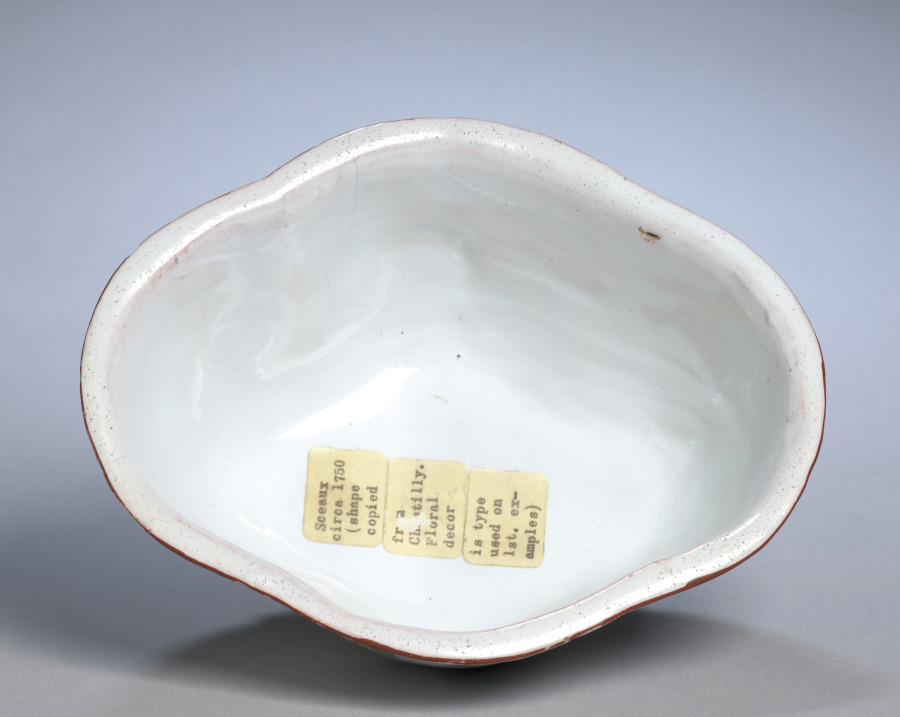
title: Sugar Basin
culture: France, 18th century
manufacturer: Sceaux Factory (French, active 1748–66)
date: c. 1750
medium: faience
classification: Ceramic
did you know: In medieval Italian churches, painted altarpieces served as a focal point for worshippers during the rituals of faith. The figures of Jesus, Mary, and eight saints are framed by a golden background that would have glistened in the flickering candlelight of the church.